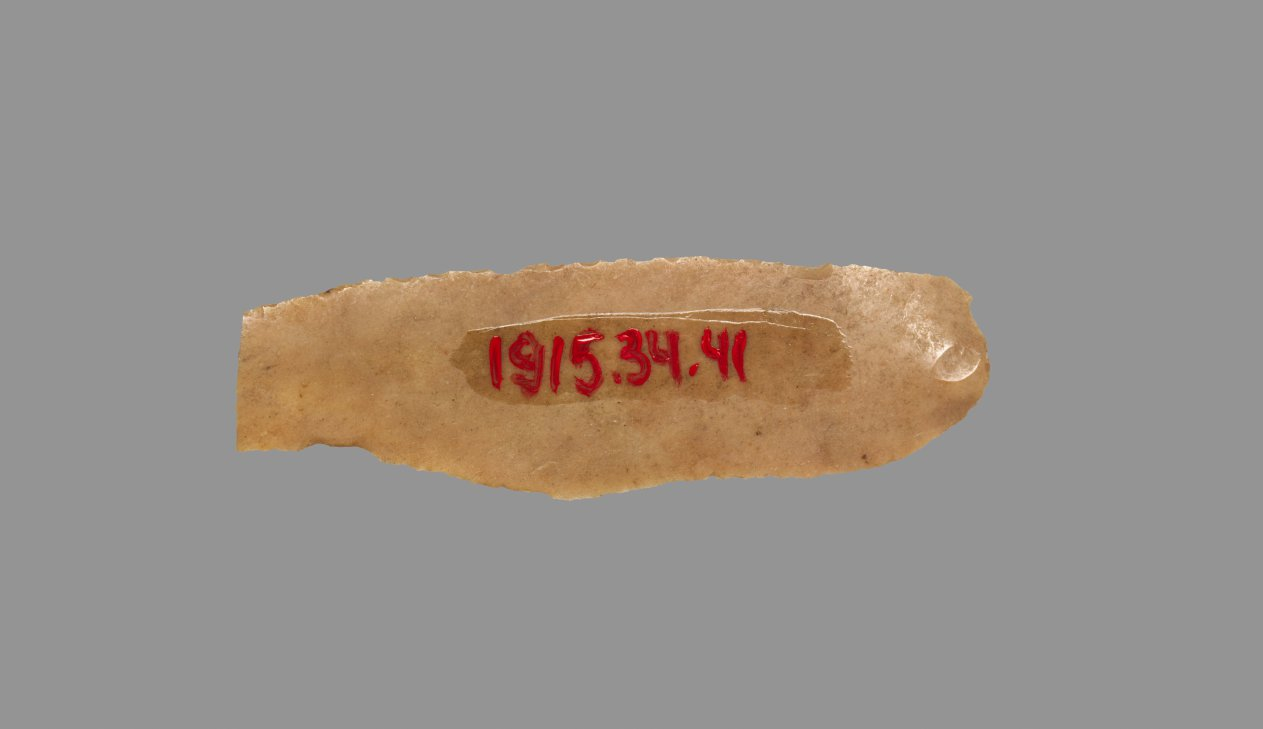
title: Sickle Blade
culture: Egypt, Middle Kingdom (2040–1648 BCE), Dynasty 12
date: 1980–1801 BCE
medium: flint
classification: Implements